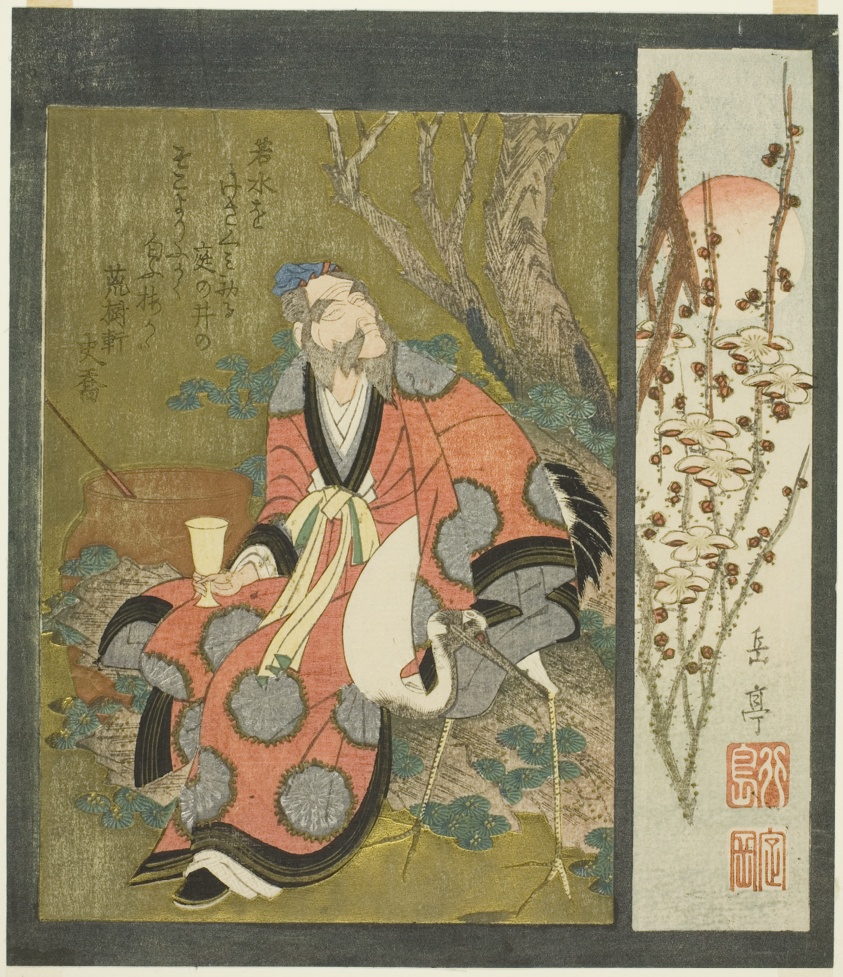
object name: Print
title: Lin Hejing (Rin Nasei) with Crane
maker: Yashima Gakutei (Japanese, 1786 (?)-1868)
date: 19th century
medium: Color woodblock print; shikishiban, surimono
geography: Japan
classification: woodblock print; print; asian art